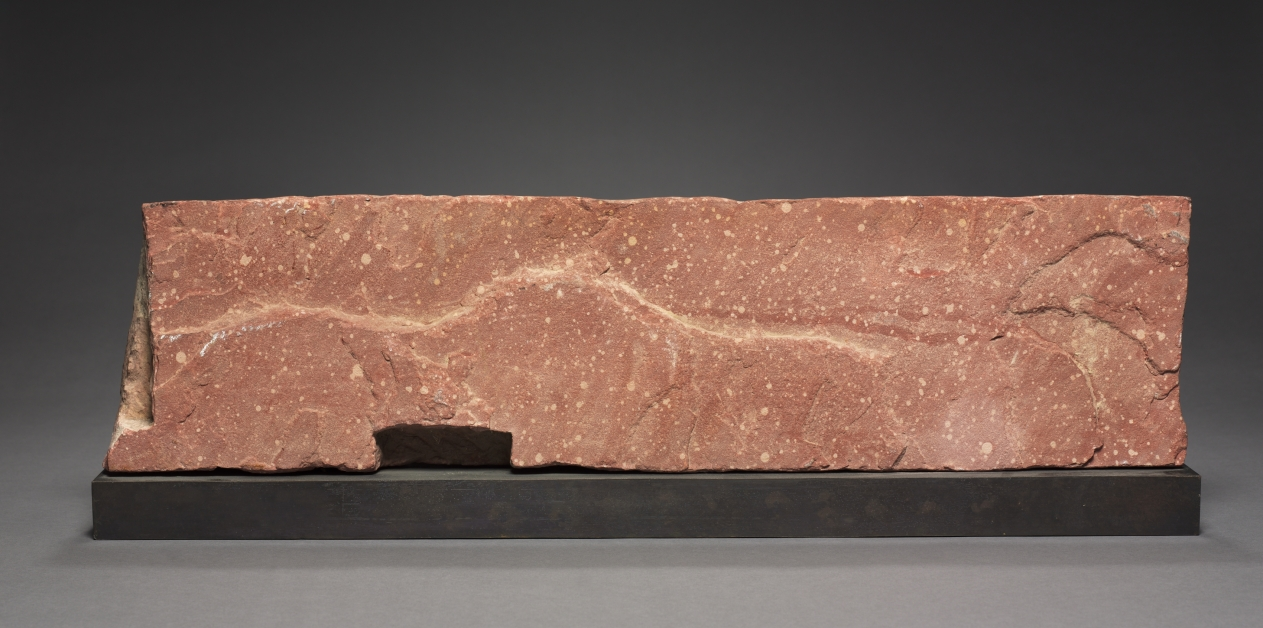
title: Section of a Coping Rail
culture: India, Mathura, Kushan period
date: 1–200 CE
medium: sandstone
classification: Stone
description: The bells are intended to evoke the sounds that once accompanied the sacred space as much as visual ornamentation. A lion and a leonine figure with a human face bound enthusiastically as part of a parade of creatures who circle the monument in the proscribed clockwise direction. The exaggerated linear outlining of their features and the flatness of their bodies are stylistic features of relief sculpture from this period. The motif in the center has vegetal fronds symmetrically springing from a lotus rosette in the form of an auspicious symbol called shrivatsa, which is also found on the chests of Jinas-liberated beings of the Jain tradition-and the Hindu god Vishnu.